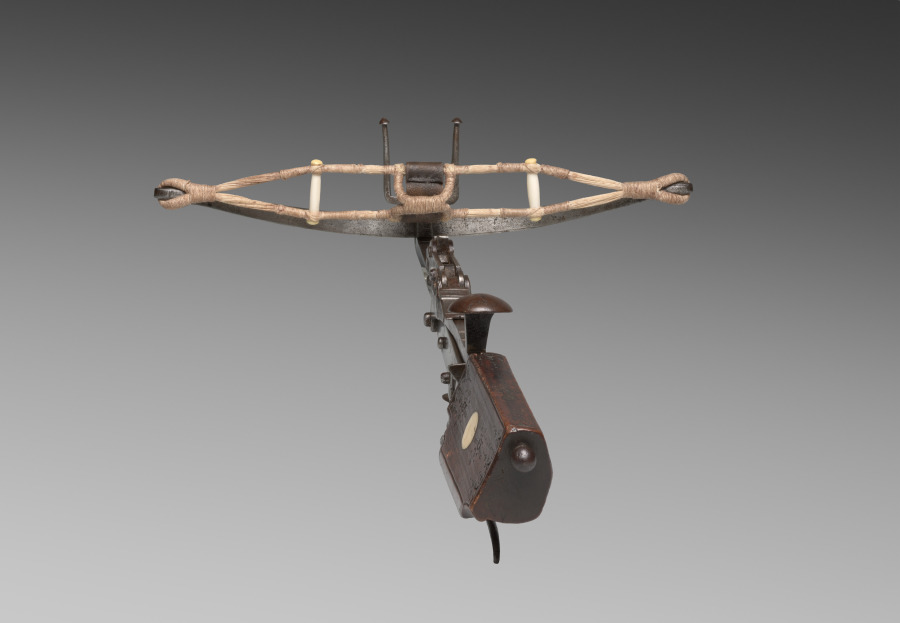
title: Pellet Crossbow for a Child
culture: Germany, early 17th Century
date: c. 1600–1650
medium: wood, bone inlay, steel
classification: Arms and Armor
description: This crossbow, made for the use of a small child, was designed to throw small stones or pellets. The bow string is an accurate replacement.